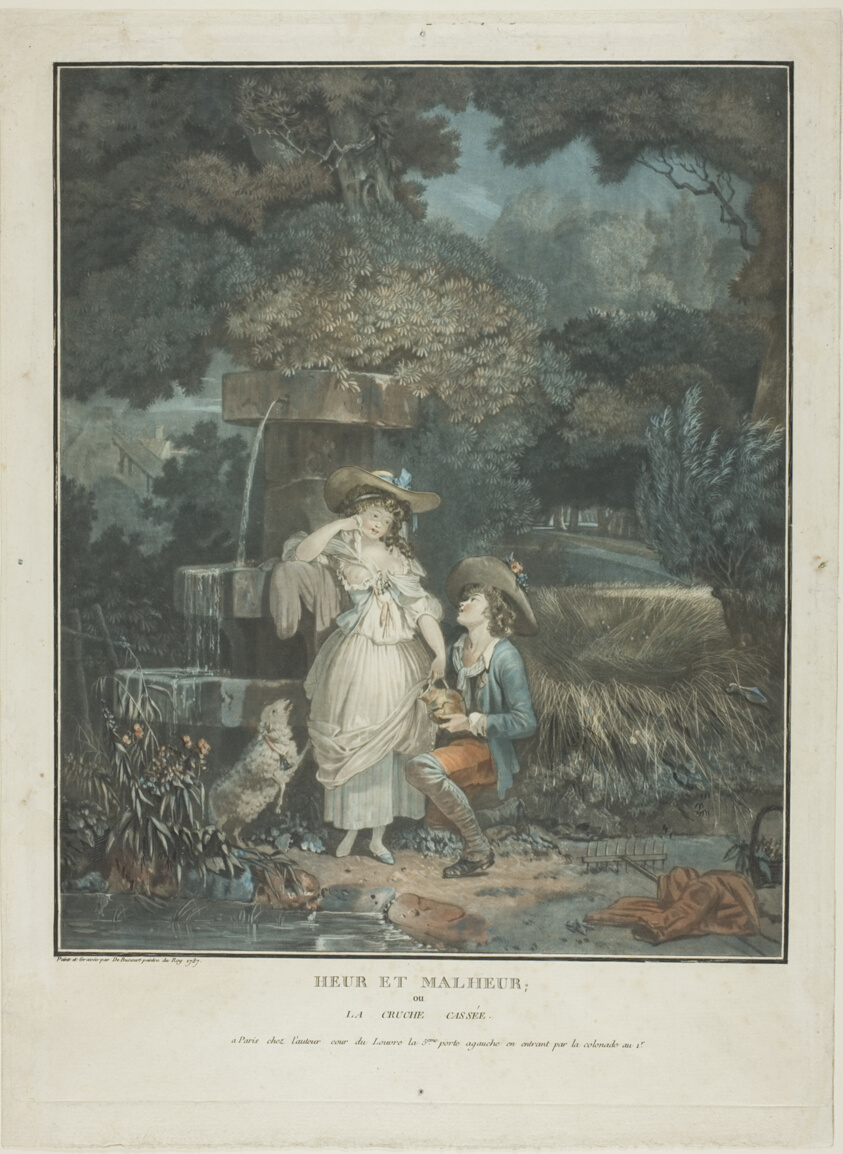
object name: Print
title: Heur et Malheur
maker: Philibert Louis Debucourt (French, 1755-1832)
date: 1787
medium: Color aquatint with engraving in black ink on cream laid paper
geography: France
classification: aquatint; print; prints and drawing